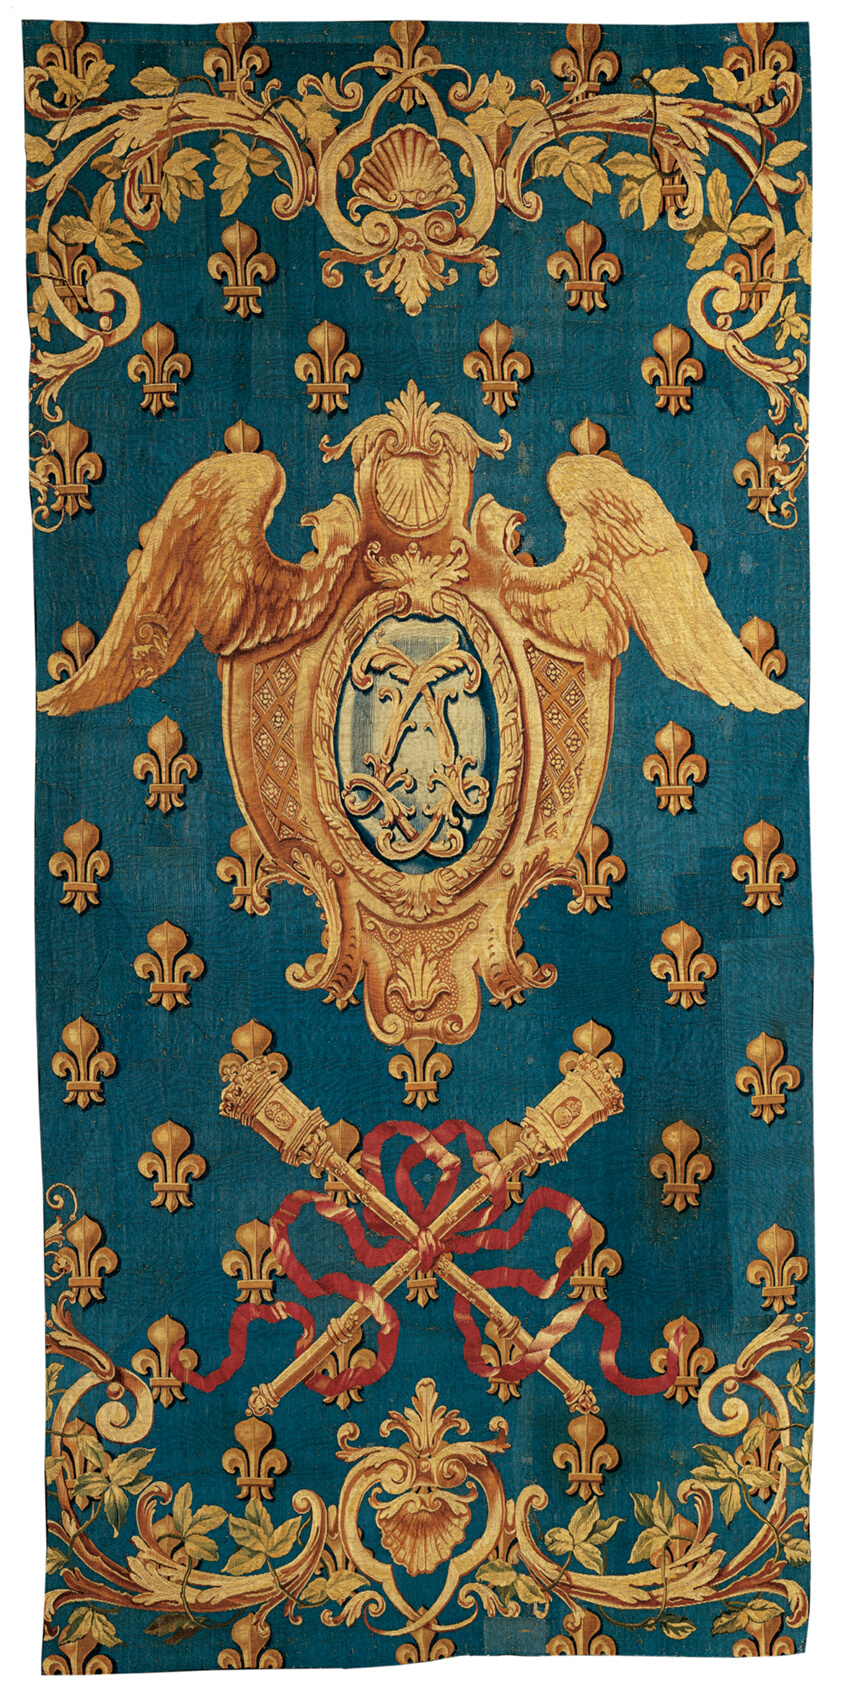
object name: Textile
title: Chancellerie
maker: Woven at an unknown workshop at the Manufacture Royale des Gobelins; France, presumably Paris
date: 1718-21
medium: Wool and silk, slit and double interlocking tapestry weave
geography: France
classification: weaving - tapestry; textile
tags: Monograms, coat of arms, royalty, cartouches, fleur de lis, king, ribbon